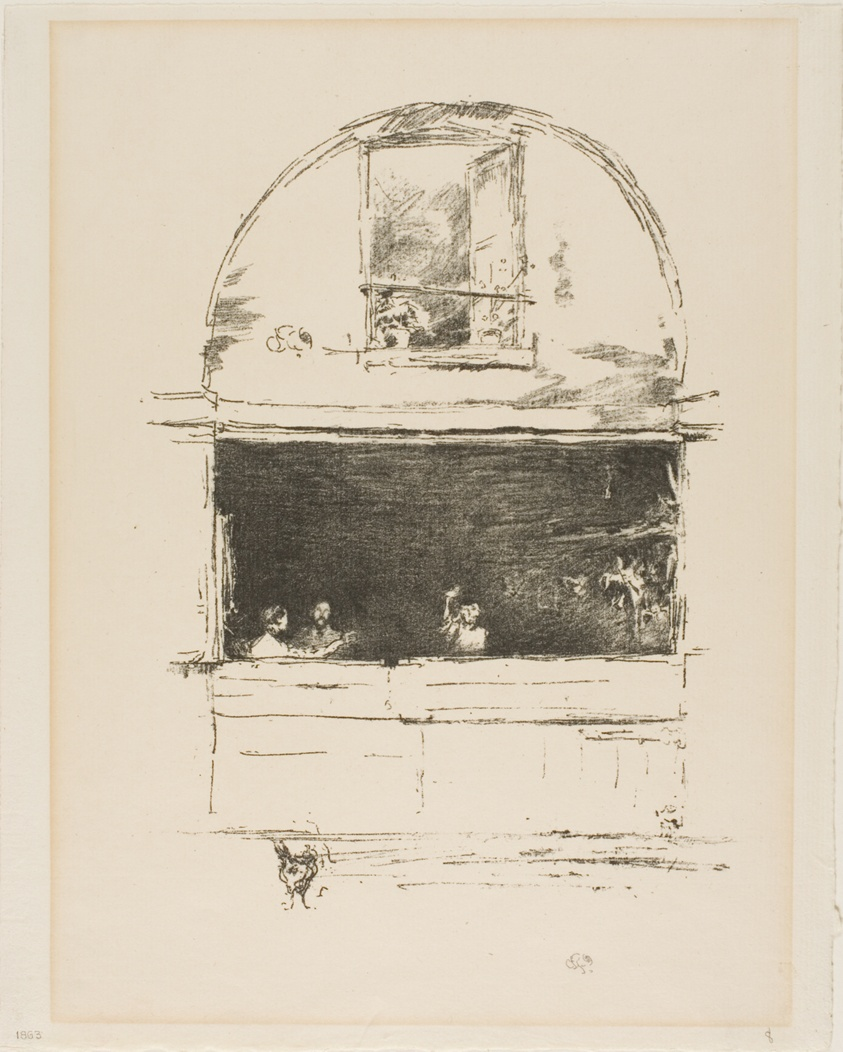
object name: Print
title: The Forge, Passage du Dragon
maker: James McNeill Whistler (American, 1834-1903)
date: 1894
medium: Transfer lithograph in black with stumping, on cream laid paper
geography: United States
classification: transfer lithograph; lithograph; print; prints and drawing; paper